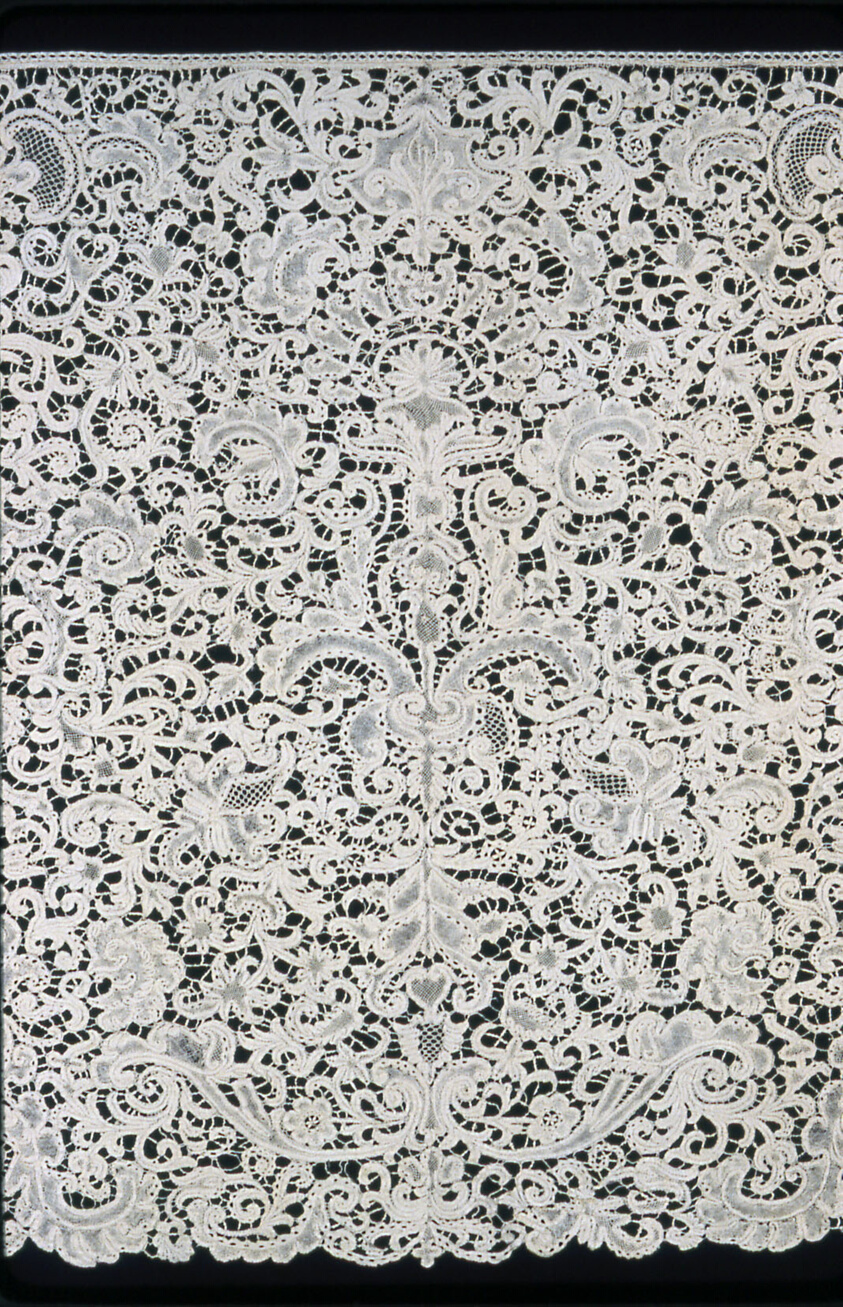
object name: Textile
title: Flounce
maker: Flanders or Italy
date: 1701/25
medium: Linen, bobbin part lace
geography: Flanders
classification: textile; lace - bobbin